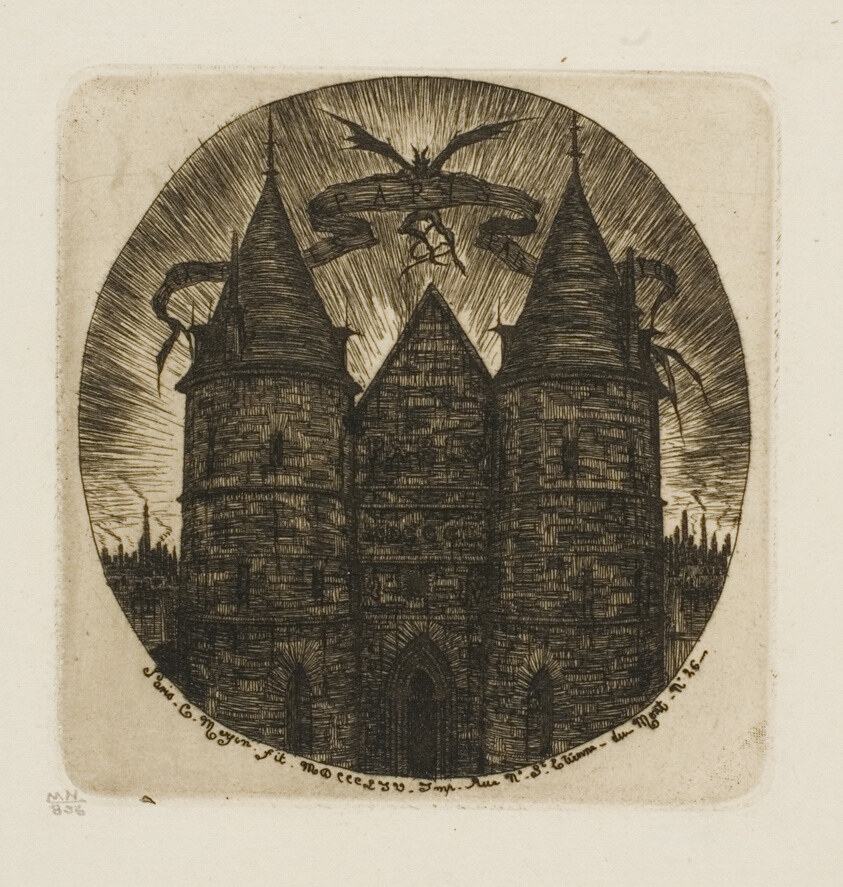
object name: Print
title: The Old Gate of the Palace of Justice, Paris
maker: Charles Meryon (French, 1821-1868)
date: 1854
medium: Etching and drypoint on ivory laid paper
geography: France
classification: etching; print; prints and drawing